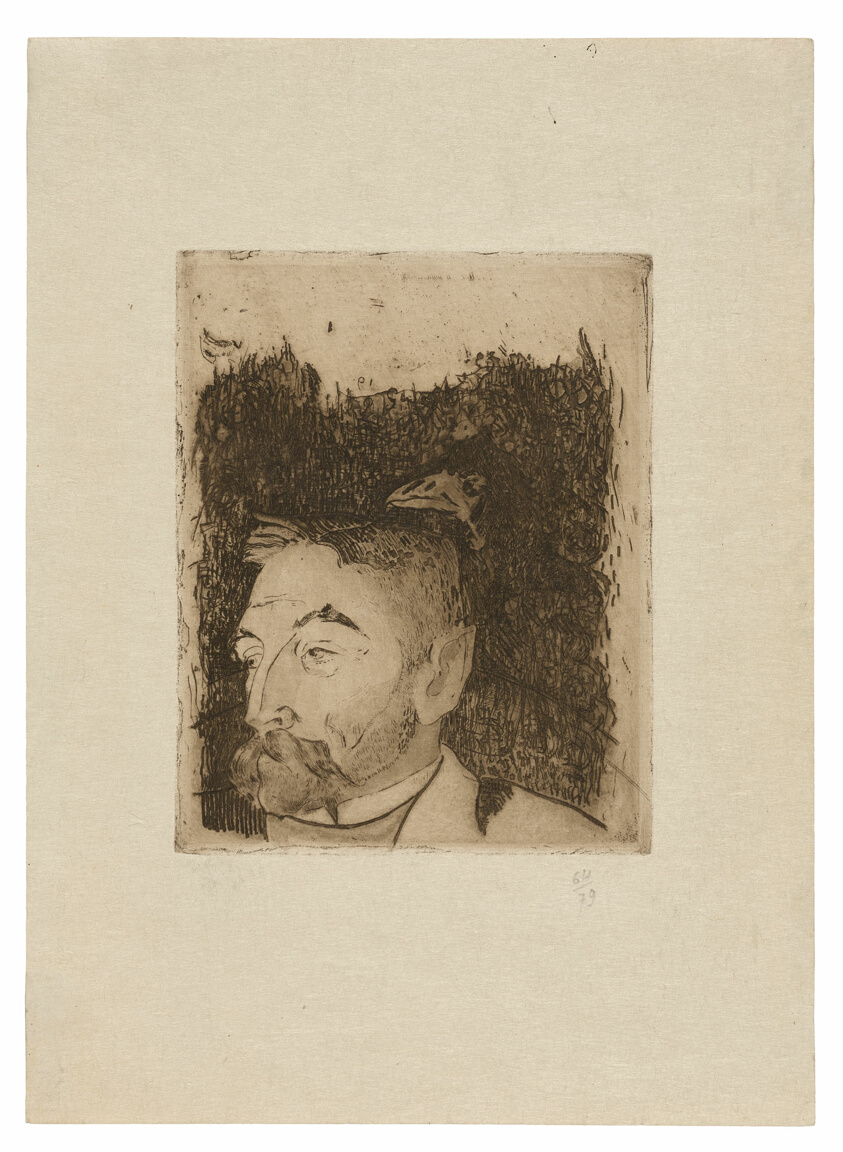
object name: Print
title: Portrait of Stéphane Mallarmé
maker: Paul Gauguin (French, 1848-1903)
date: 1891, printed 1919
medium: Etching, drypoint and engraving in brown-black on cream Japanese laid paper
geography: France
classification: etching; print; prints and drawing